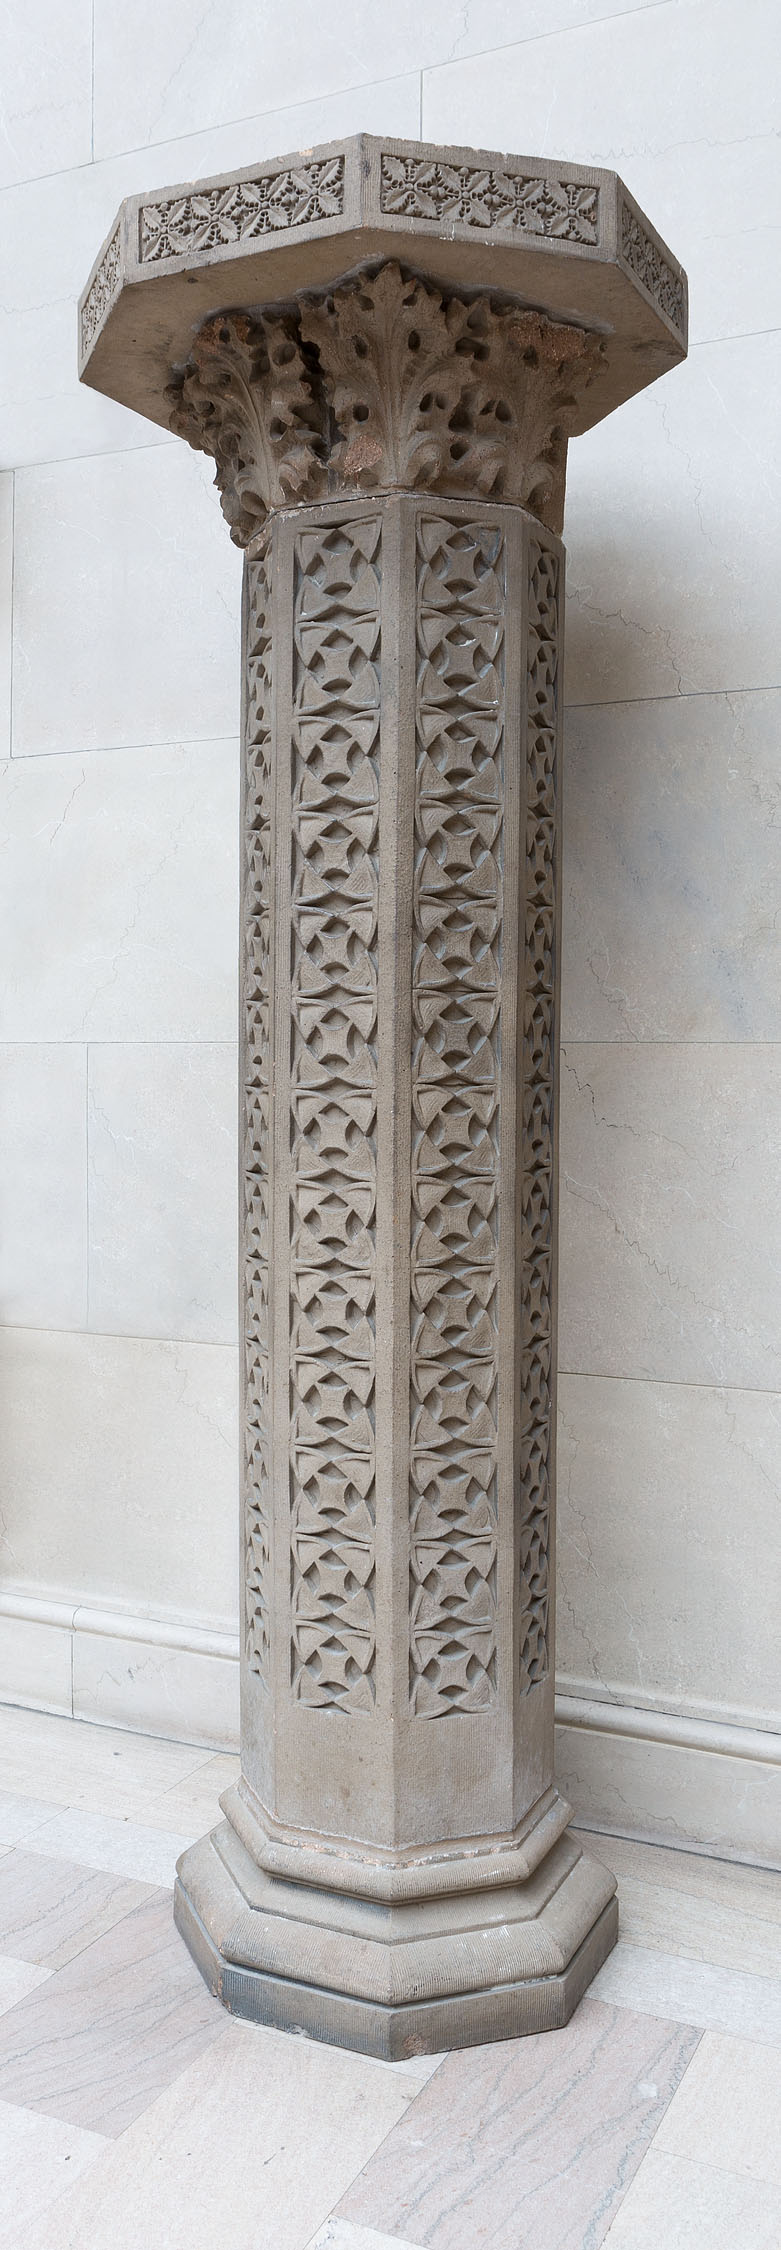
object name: Architectural fragment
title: Garrick Theater, Chicago, Illinois, Exterior Column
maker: Adler & Sullivan; American, 1883–1895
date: 1891–92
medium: Terra-cotta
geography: United States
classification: architectural fragment